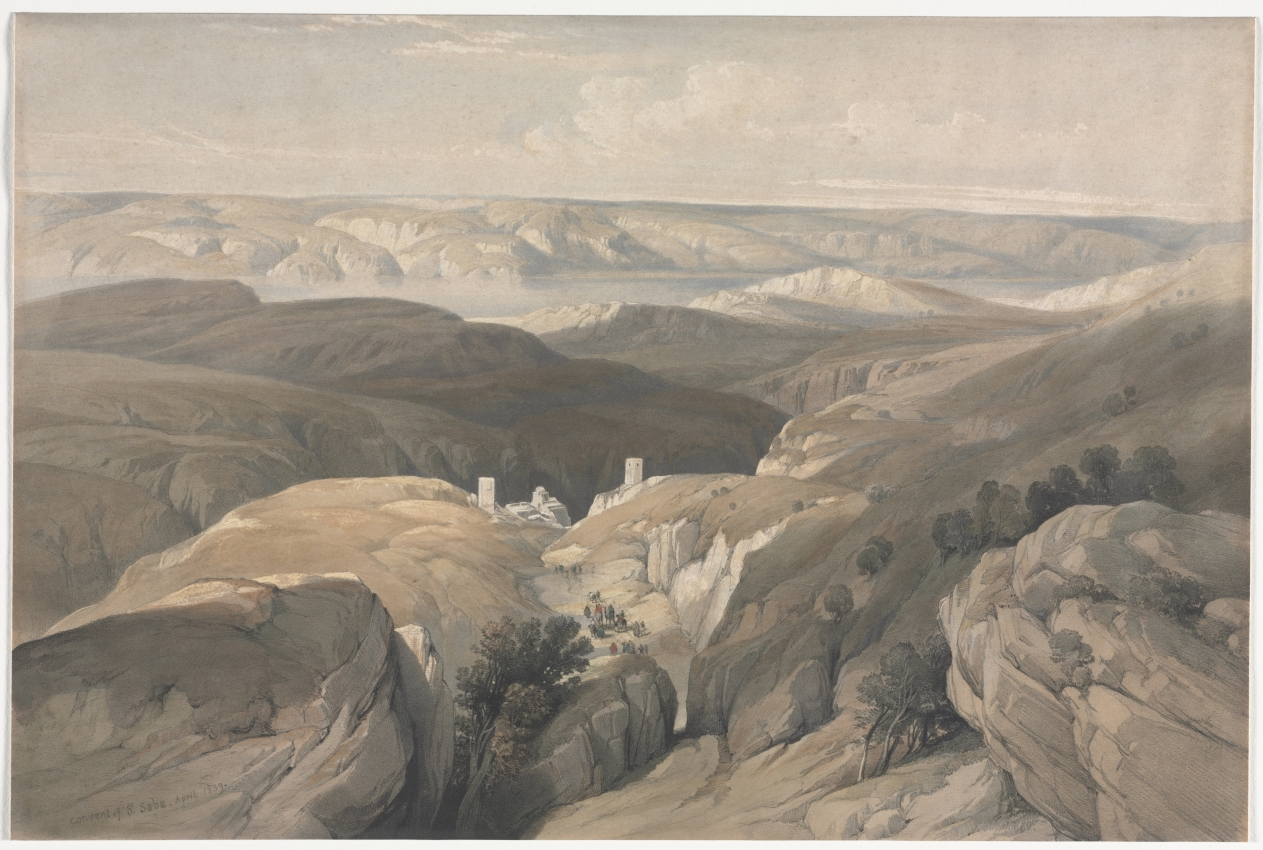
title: Convent of St. Saba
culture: England, 19th century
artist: David Roberts (Scottish, 1796–1864)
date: 1839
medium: color lithograph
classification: Print